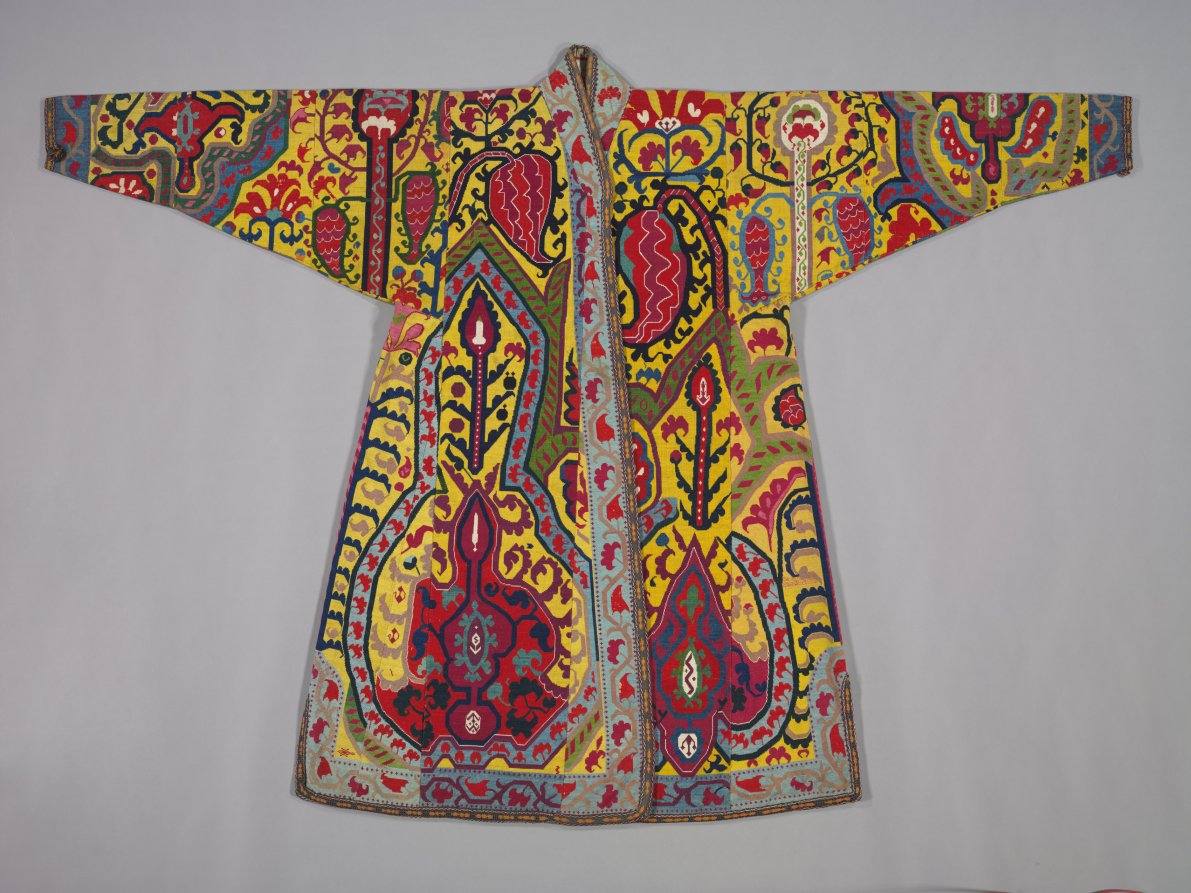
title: Man's surcoat (khalat)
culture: Uzbekistan, Shahr-i Sabz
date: late 1800s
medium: Silk: embroidery, cross-stitch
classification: Garment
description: Prestigious men’s surcoats embellished with designs such as this dramatic decoration in cross-stitch were among the most elaborate silk-thread embroidered garments in Central Asia. In a flamboyant style, large palmettes framed by split palmette leaves dominate with quartered rosettes and smaller flora on a brilliant yellow ground. Foliate vines enhance the edge along the front center opening, hemline, and cuffs. It is lined with an ikat of cypress trees and finger-looped trim. The style and technique represent professional work from Shahr-i Sabz, south of Samarkand. The pattern was drawn on the cotton ground cloth of the surcoat, then disassembled for stitching, and finally reassembled—revealed by severed and misaligned motifs plus mismatched colors.